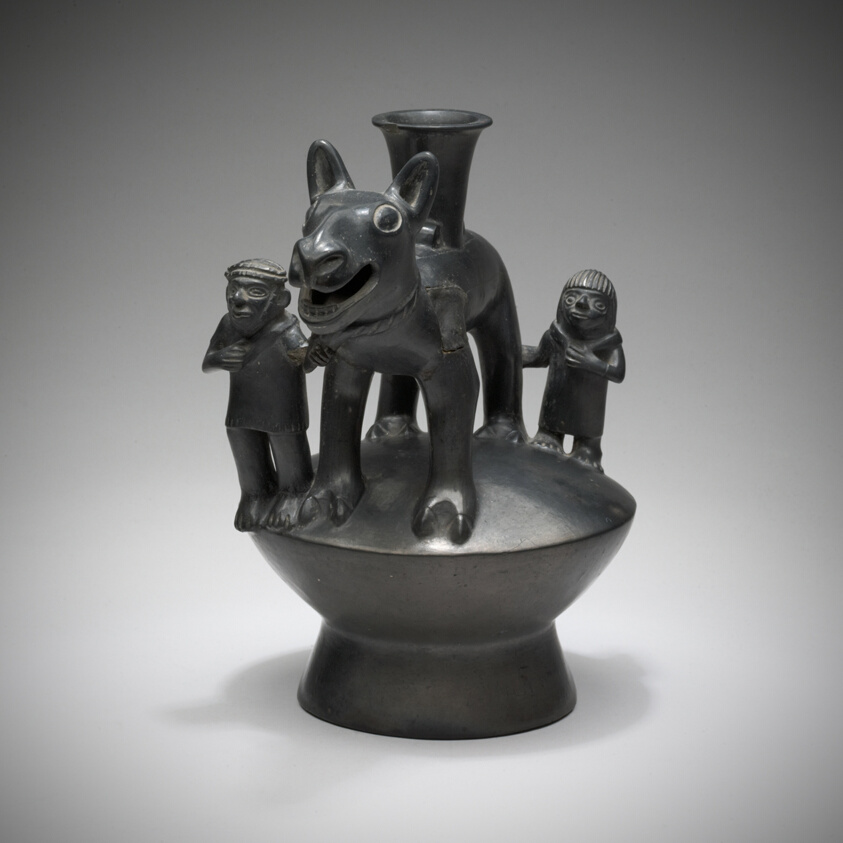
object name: Vessel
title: Vessel in the Form of a Llama and Attendant Figures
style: chimú, late intermediate period, Pre-Columbian, americas, inca, andes, Arts of the Americas, andean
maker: Chimú-Inca (North coast, Peru)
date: 1200–1450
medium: Ceramic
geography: Peruvian North Coast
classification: blackware (black basaltes); earthenware; ceramics; vessel; art of the americas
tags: people, animals, procession, ritual, llama